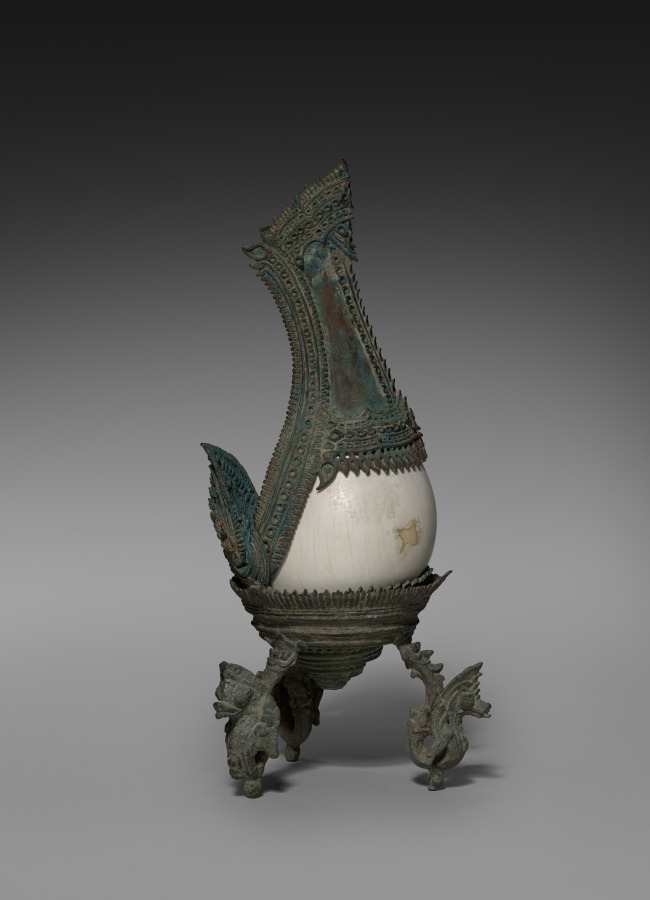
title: Conch Shell with a Figure of Hevajra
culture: Cambodia, Khmer, Angkor Period, 12th-13th Century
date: 1100s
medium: shell and bronze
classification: Sculpture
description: A royal temple like Banteay Chhmar was built for performing rituals and to honor images of gods, Buddhas, and other sacred or enlightened beings for the sake of the kingdom’s protection and ongoing prosperity. Conch shells were blown at the start of rituals to make the sound corresponding to the syllable om. The dancing figure of Hevajra, a Buddhist being of enlightenment with eight heads, sixteen arms, and four legs, has been worked into the bronze embellishment of the shell. Hevajra was elevated to a prominent position in Khmer Buddhism of the Angkorian period as the standard figure denoting the practice of rituals prescribed in a text called the Hevajra-tantra. The tripod stand with three serpents is probably not original to the shell.